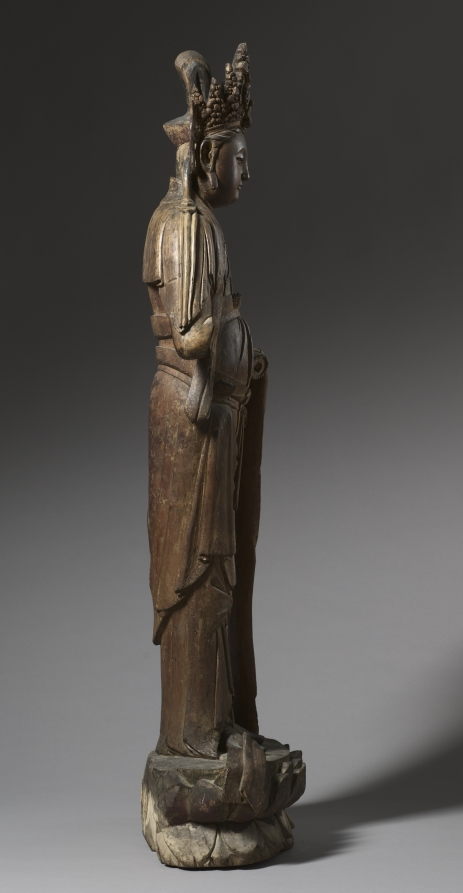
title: Standing Guanyin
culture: China, Southern Song dynasty (1127–1279)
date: 1127–1279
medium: wood with traces of gesso, polychromy and gilding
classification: Sculpture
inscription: Inscribed on scarf end: [for] our mentor Yüan-sheng [from] abbot-priest Ch'eng-lang, disciple Chin-yen, and second-generation disciple Wu-huai (trans. Wai-kam Ho)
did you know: This bodhisattva Guanyin was carved from a single block of willow wood.